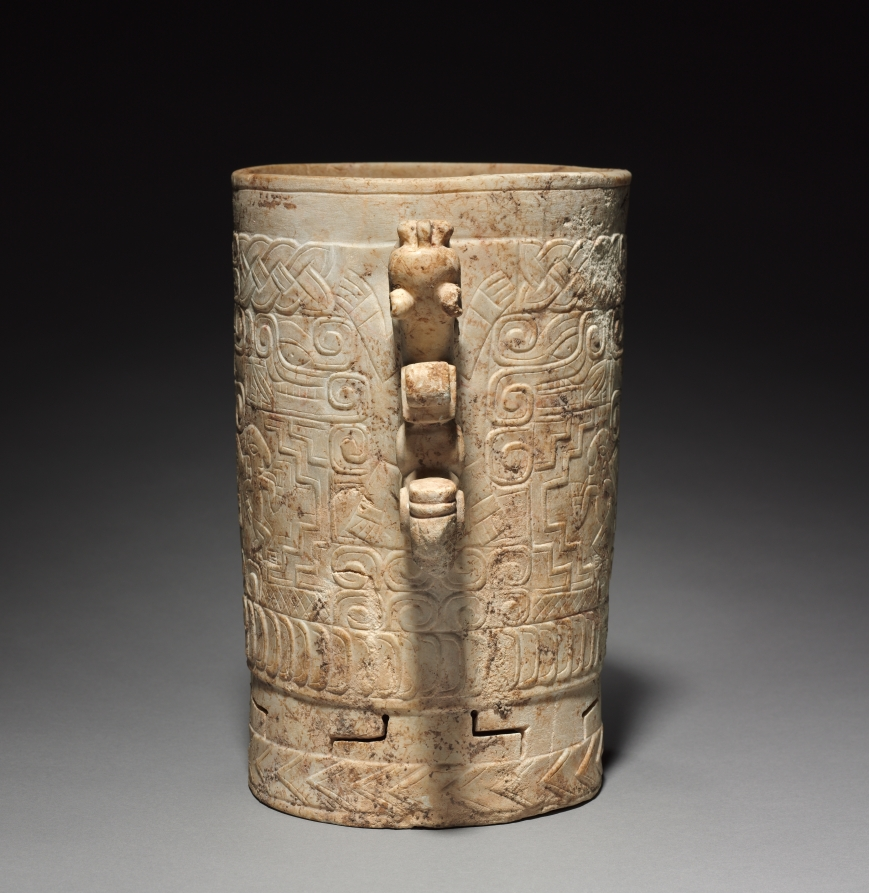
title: Carved Stone Vessel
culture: Northwest Honduras, Ulúa Valley, 8th-10th century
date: 700–1000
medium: marble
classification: Sculpture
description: This stone vessel, made by eastern neighbors of the Maya, is one of the finest and largest of its kind. On the exterior are several motifs that combine to create an unusually complex design that features a grotesque head, either in profile or front-facing, with a leg near its mouth. In the main panel a frontal version of the head hovers over two legs, the knees pointed sharply outward. Beside each leg is a lively human, rarely seen in such works. Little is known about the motifs’ meanings or the vessel’s use.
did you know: Carved in the round, the vessel's handles suggest a feline that emerges from a serpent-like head with an upturned snout.